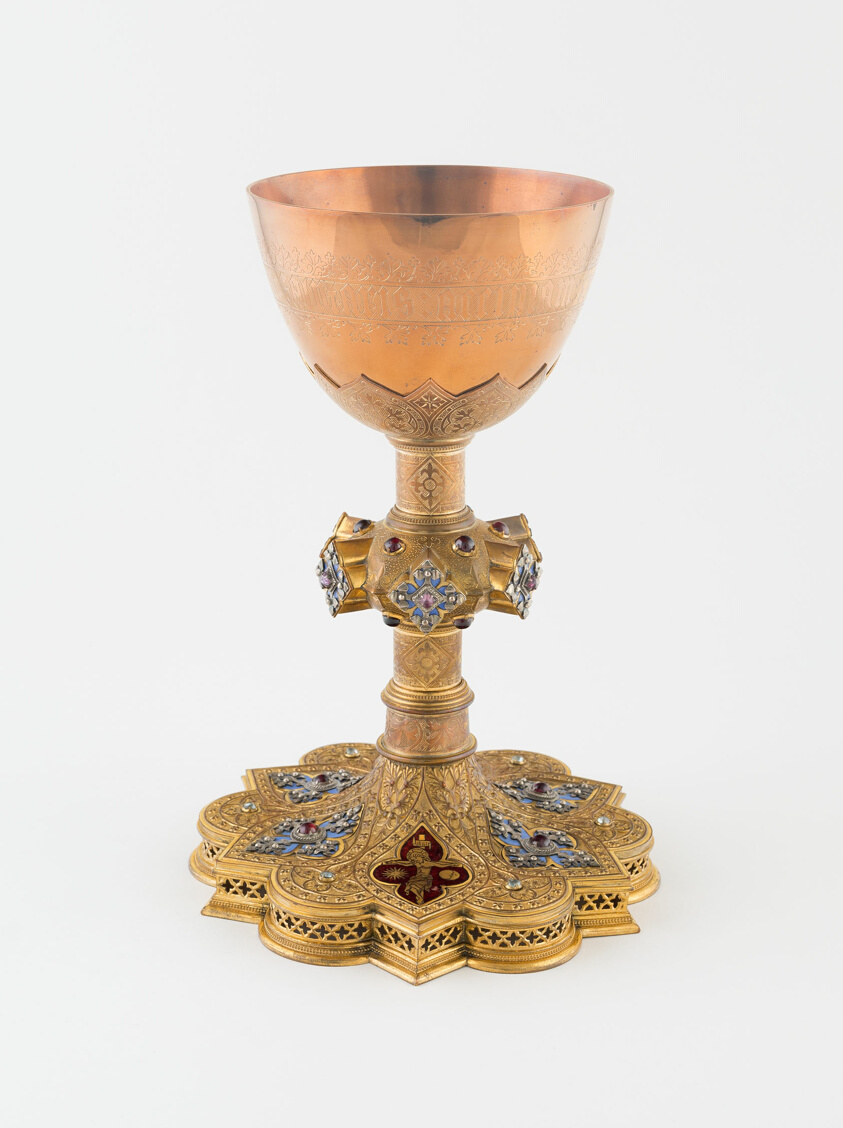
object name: Metalwork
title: Model Chalice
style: gothic revival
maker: Designed by Augustus Welby Northmore Pugin; English, 1812–1852; Manufactured by John Hardman & Company; English, 1838–2008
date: c. 1849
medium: Gilt base metal, enamels, and semiprecious stones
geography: England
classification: metalwork; european decorative arts